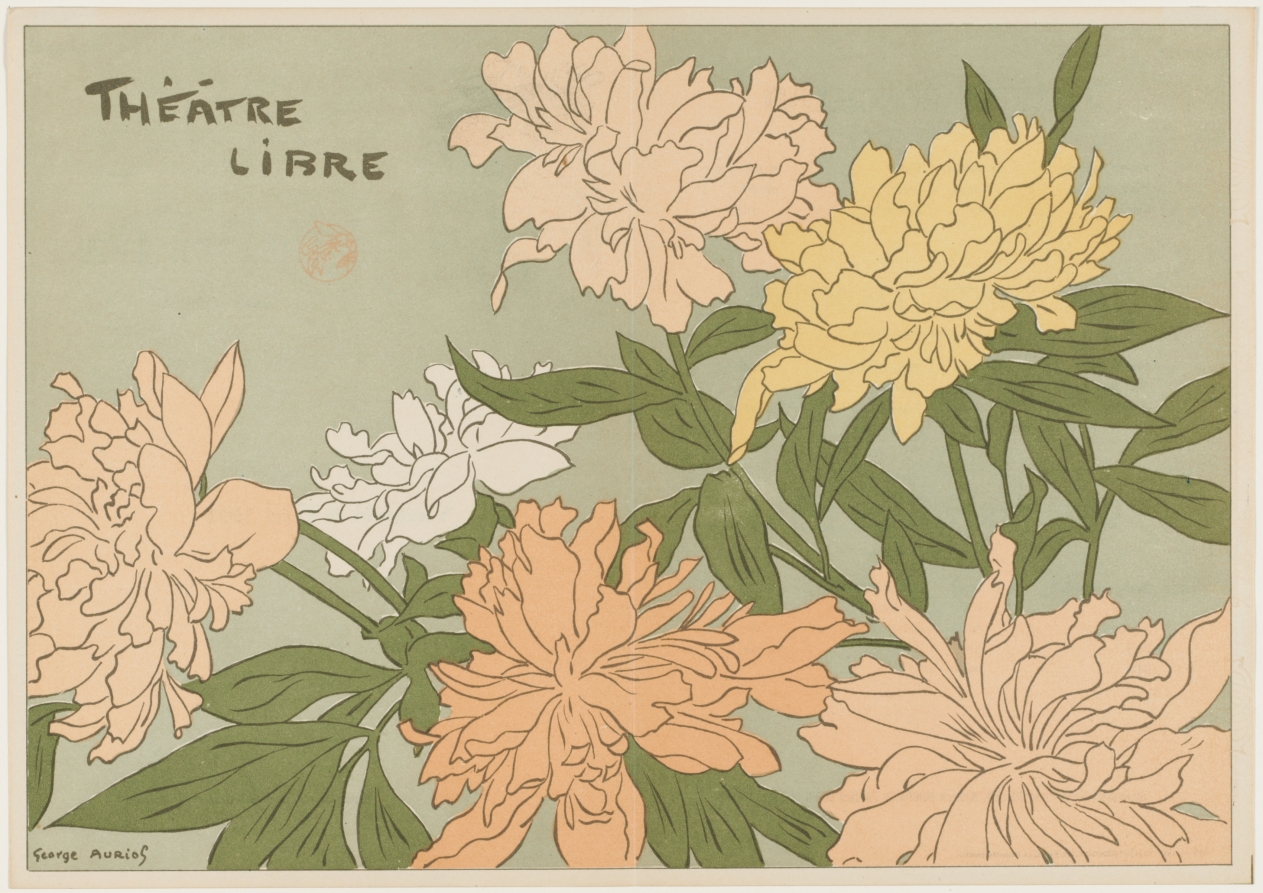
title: "Myrane" et "Les Chapons" (Program for Théâtre Libre)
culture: France, 19th century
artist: George Auriol (French, 1863–1938)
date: 1889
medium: color lithograph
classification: Print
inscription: signed in the stone: Georges Auriol